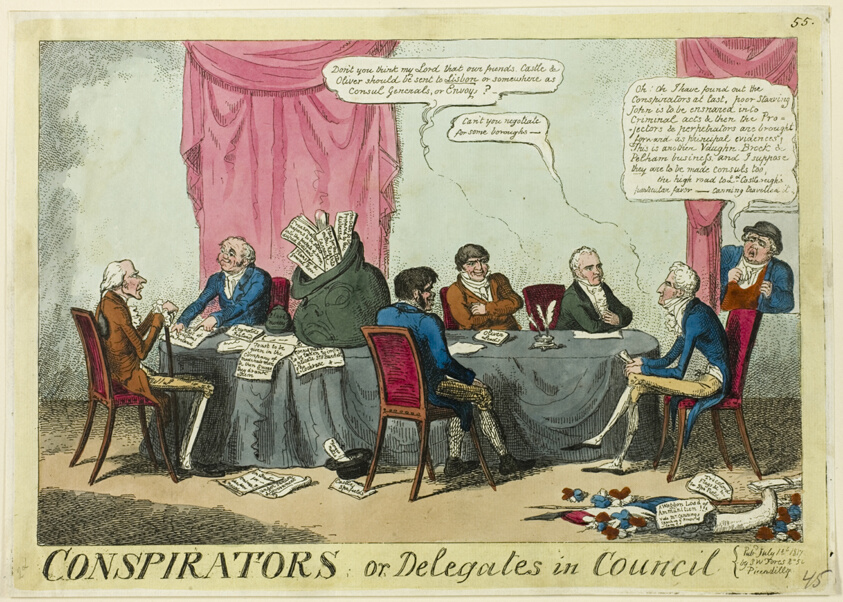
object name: Print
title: Conspirators, or Delegates in Council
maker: George Cruikshank (English, 1792-1878); published by S.W. Fores (English, 1761-1838)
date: published July 1, 1817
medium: Hand-colored etching on ivory laid paper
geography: England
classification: etching; print; prints and drawing